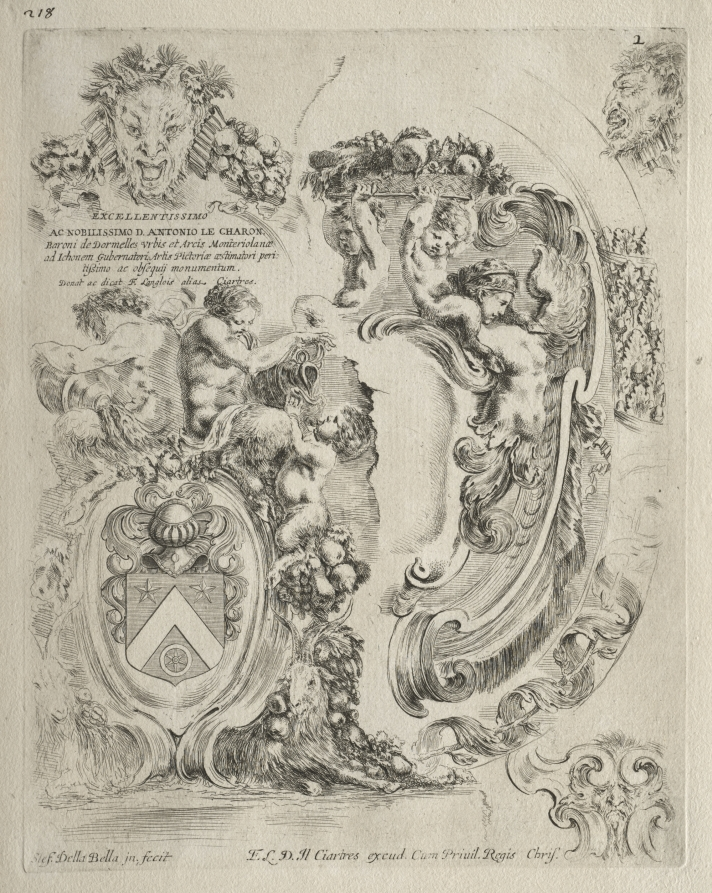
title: Collection of Various Caprices and New Designs of Cartouches and Ornaments: No. 2, Dedication Page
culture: Italy, 17th century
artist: Stefano Della Bella (Italian, 1610–1664)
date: 1646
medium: etching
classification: Print